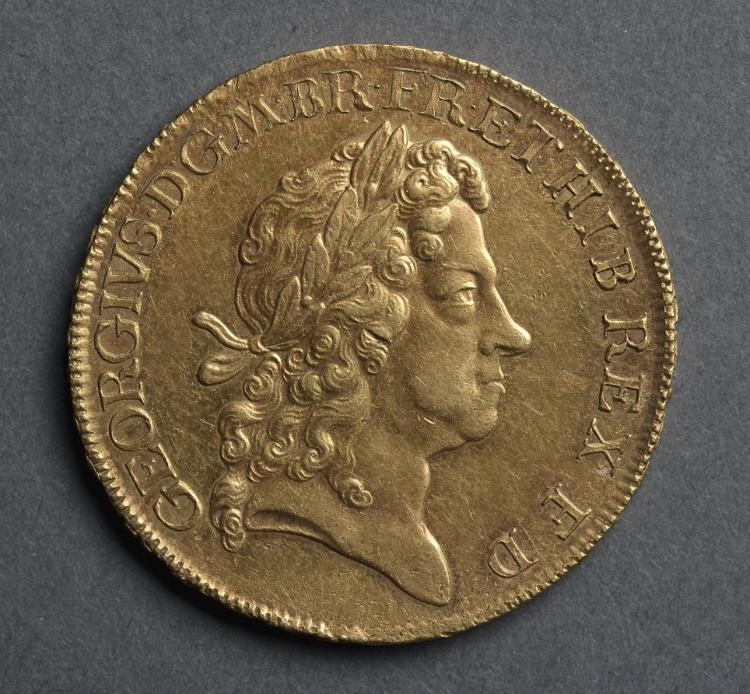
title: Five Guineas: George I (obverse)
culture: England, George I, 1714-1727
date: 1716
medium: gold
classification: Coins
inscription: GEORGIVS.D.G.M.BR.FR.ET.HIB.REX.F.D.